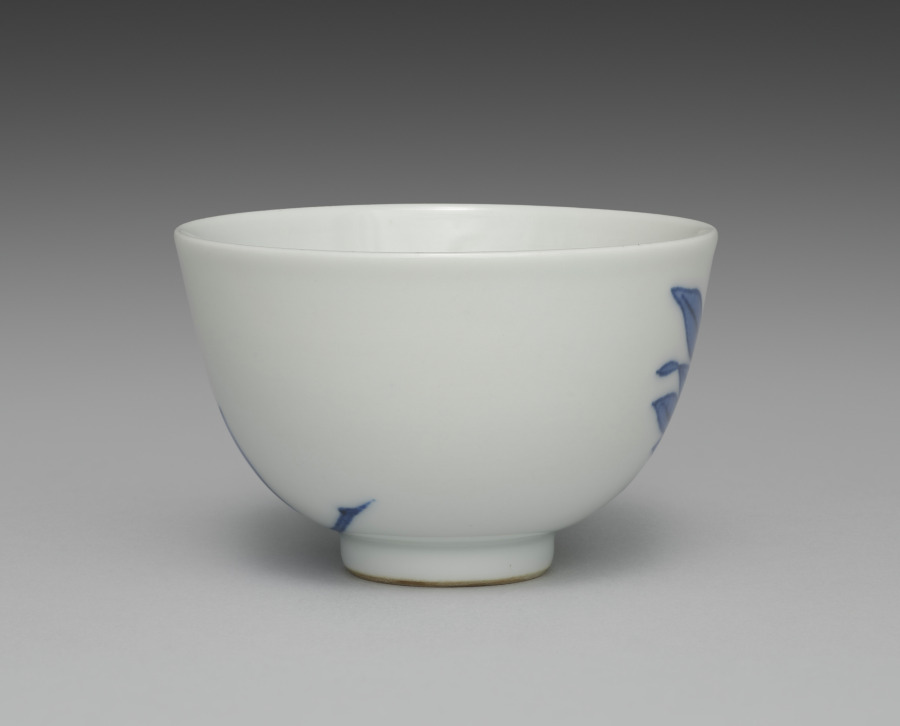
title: Teacup from Tea Set with Orchids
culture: Japan, Meiji period (1868–1912)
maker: Seifū Yohei III (Japanese, 1851–1914)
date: c. 1893–1914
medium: Porcelain with underglaze blue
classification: Ceramic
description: Although the teapot here is stored in a separate box from the five cups, these six pieces may once have been part of a tea set that included other tools such as a water cooler. The teacups have orchid flowers on both sides in underglaze blue, as well as a blue band inside the footring. The teapot has the same design and a blue band painted around the bottom of the lid’s knob. The cups’ long wood storage box is stamped on the exterior, over the lid and base, with a small red seal reading “Satō.” The same seal appears on five small squares of yellow textile, one placed in the bottom of each compartment in the teacup storage box. These are additional to the customary yellow cloths stamped with a “Seifu” seal. Interestingly, four of the Seifū cloths are stamped with an ovoid seal, while the remaining cloth, which is a slightly lighter color, has an unusual seal that is not quite gourd-shaped and with the fū of Seifū in a stylized, unrecognizable form. The teapot has its own box with a Satō seal and is wrapped with an orange textile stamped with the same unusual Seifū seal. A set with a very similar surface design is in the Brooklyn Museum. The Brooklyn set has a water cooler and a small pitcher, in addition to the teapot and cups, and all are in a single storage box. This box records the tea tools as made with kanpakuji, or “bright-jewel white porcelain,” counted among Yohei III’s most important inventions, and carved images. In fact, both sets have a white surface much closer in coloration to the cool white of porcelain clay used in Kyoto at the time, and the designs are simply painted. The Brooklyn set was thus likely mismatched at some point with a box intended for another tea set. Nonetheless, the box may have helped prevent the set’s original components from being dispersed, and the set itself provides insight into how the other tools from the present set may have looked.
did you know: This tea set with orchids has a side-handled pot called a kyūsu, used for steeping, straining, and serving tea.